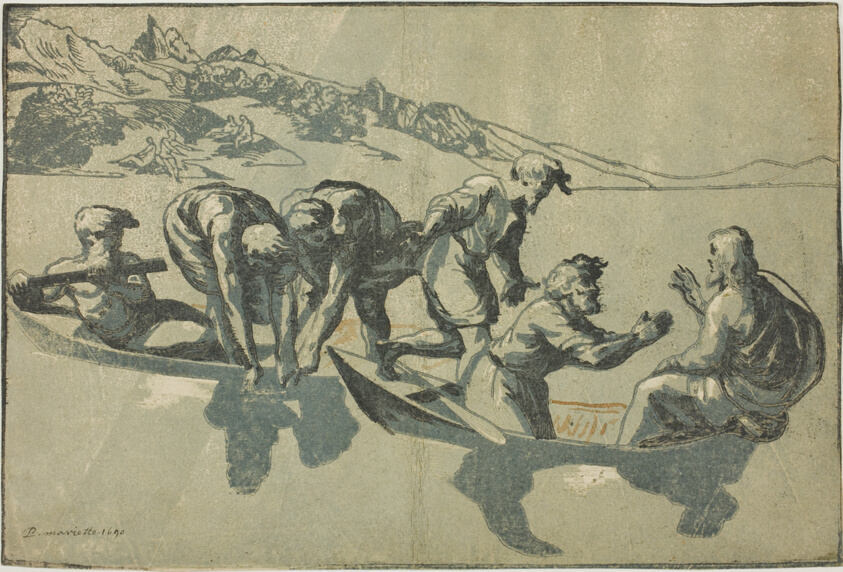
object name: Print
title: The Miraculous Draught of Fishes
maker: Niccolò Vicentino (Italian, active c. 1540-1550); after Raffaello Sanzio, called Raphael (Italian, 1483-1520)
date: c. 1540-1550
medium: Chiaroscuro woodcut in black, grayish blue, and bluish green on paper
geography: Italy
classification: woodcut; print; prints and drawing